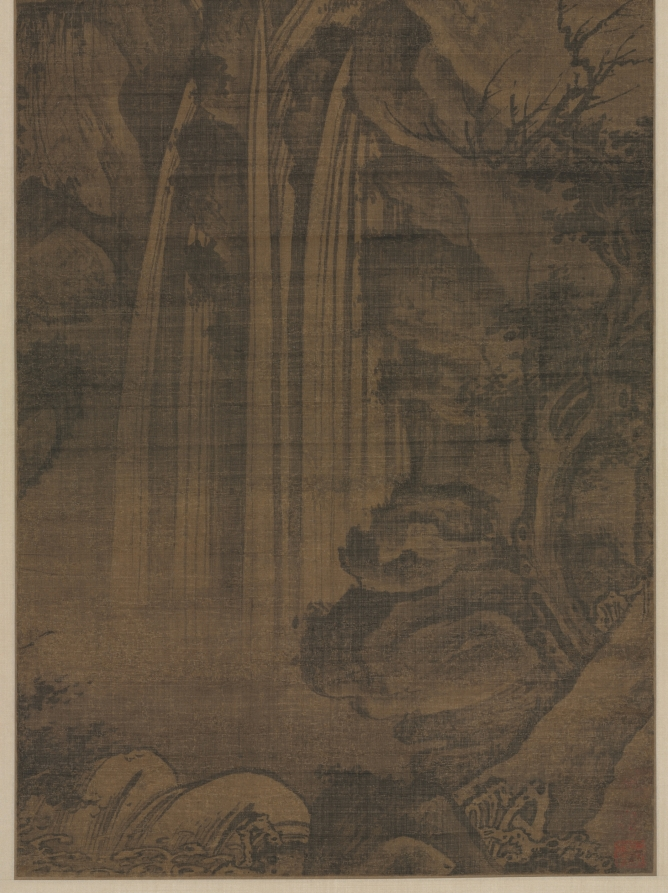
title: Waterfall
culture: China, Song dynasty (960-1279) - Yuan dynasty (1271-1368)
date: 1271–1368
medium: hanging scroll, ink and slight color on silk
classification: Painting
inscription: Label on the mounting with 2 seals of T'ang ? of Pi-ling (16th c.); label on back of mounting of Kü Kuang-hsü (1731-1797). 1 colophon and 8 additional seals: 1 colophon, dated 1625, and 2 seals of Kao P'an-lung (1562-1626); 2 seals of Liu Shu (1759-1816); 1 seal of Pi Lung (late 18th c.); 1 seal of Ts'ao tzu-wen; 2 seals unidentified. WKH